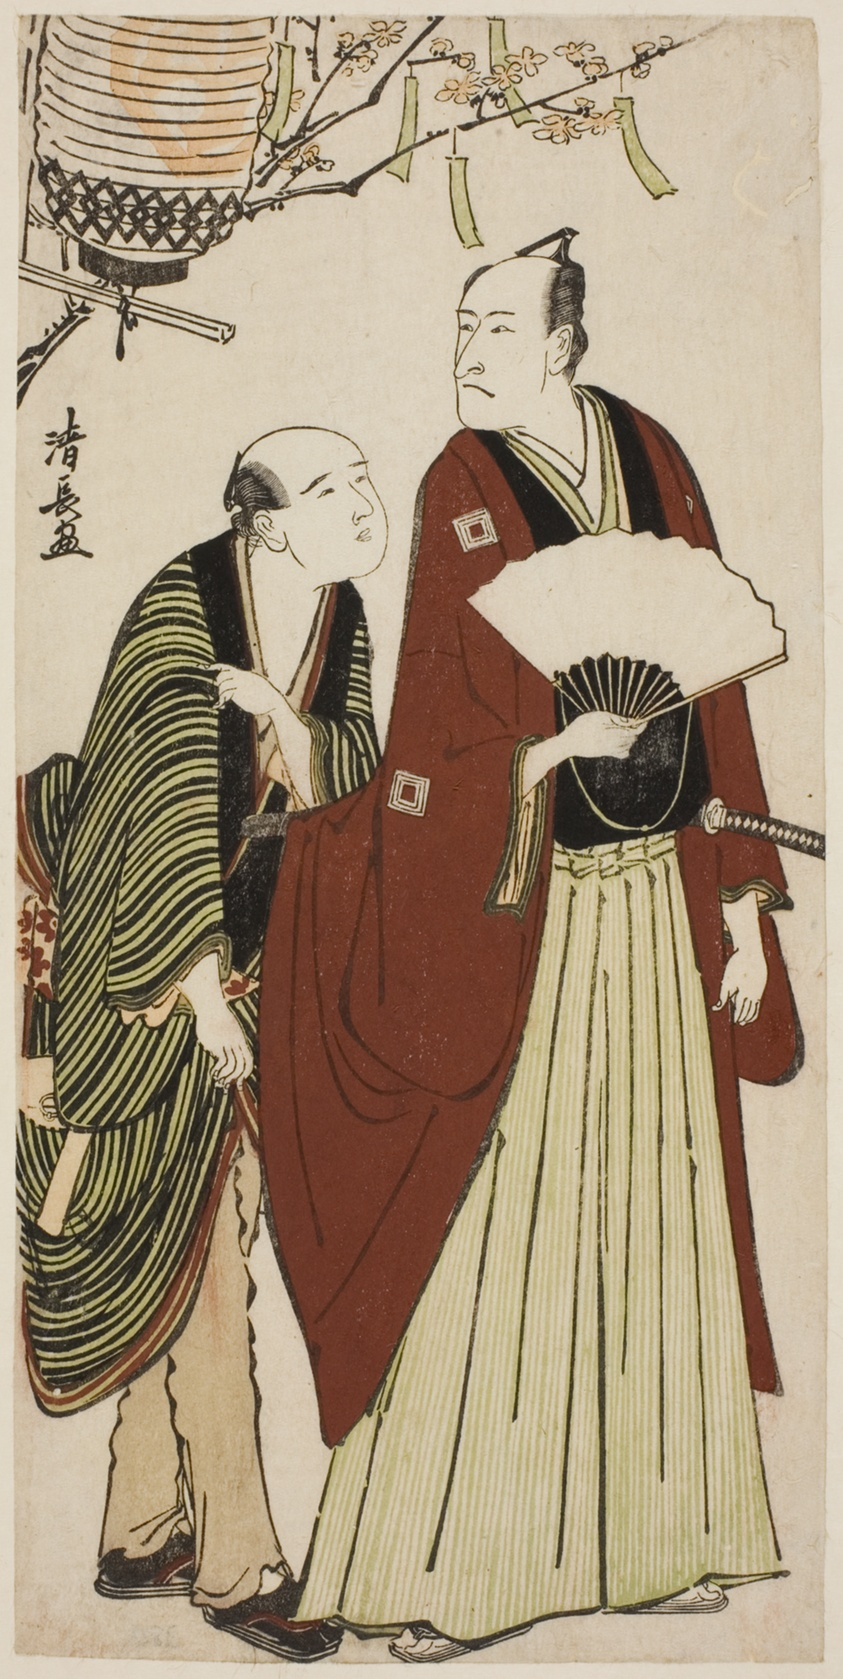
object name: Print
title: The Actor Ichikawa Danjuro V and his attendant, from an untitled series of prints showing Actors in private life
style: Japanese (culture or style)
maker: Torii Kiyonaga (Japanese, 1752-1815)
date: c. 1783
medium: Color woodblock print; hosoban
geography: Japan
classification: woodblock print; print; asian art